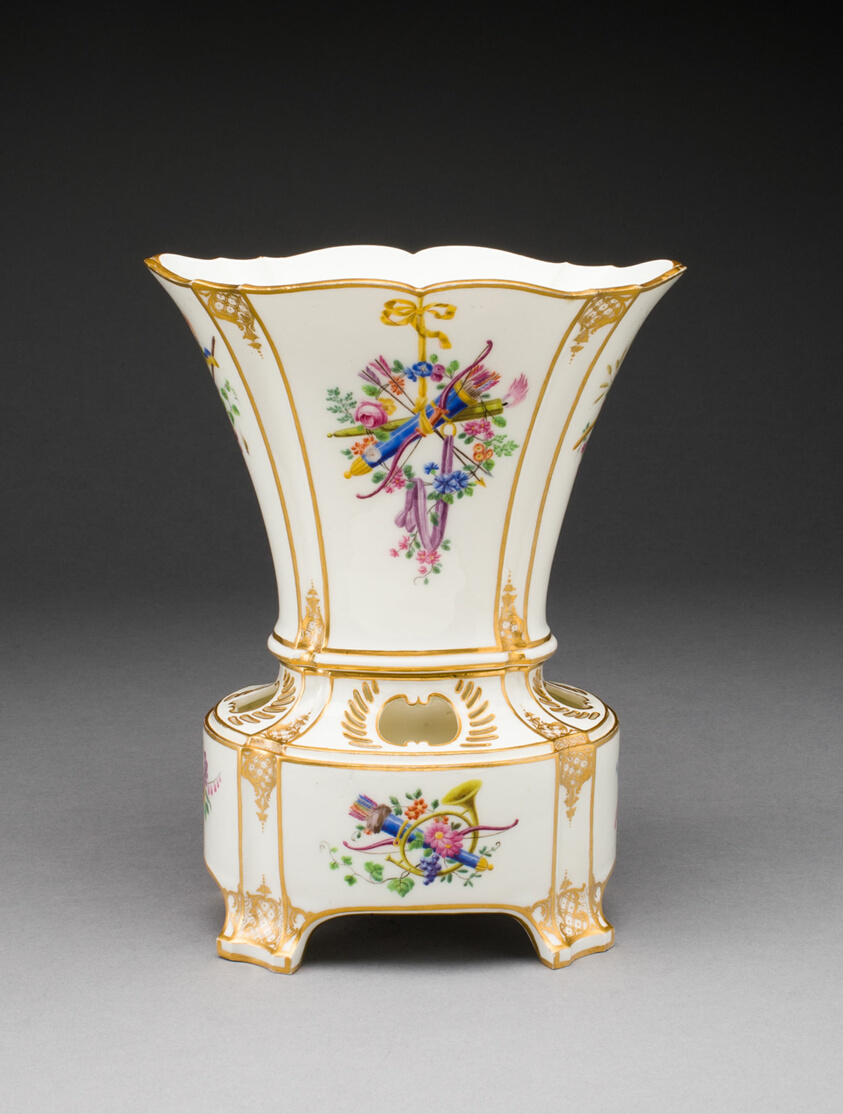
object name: Ceramics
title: Flower Vase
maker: Sèvres Porcelain Manufactory; French, founded 1740; Painted by Charles Buteux; French, active 1756-1782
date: 1759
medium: Soft-paste porcelain, polychrome enamels, and gilding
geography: Sèvres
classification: vase; vessel; european decorative arts; porcelain; ceramics